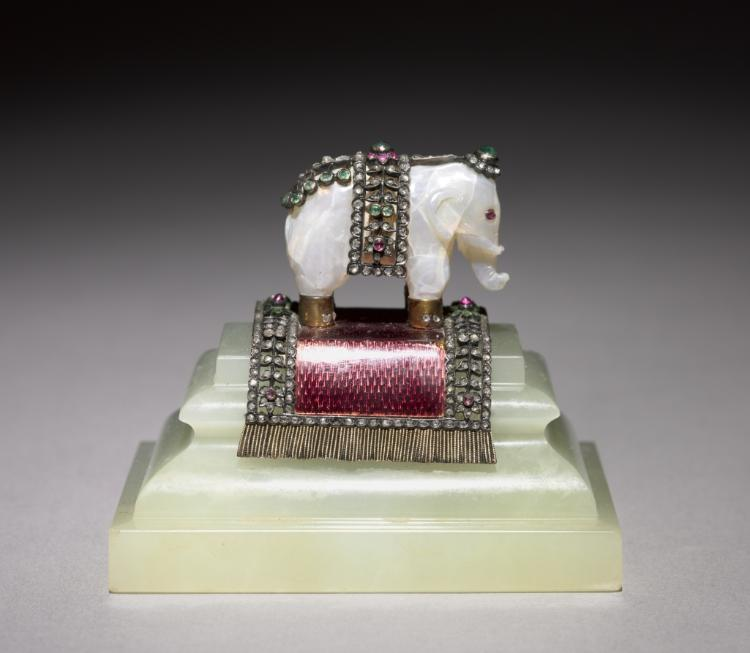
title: Elephant Bell Push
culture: Russia, St. Petersburg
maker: House of Fabergé (Russian, 1842–1918)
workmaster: Henrik Wigström (Russian, 1862–1923)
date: after 1903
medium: jade, gold, rubies, emeralds, diamonds, enamel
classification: Miscellaneous